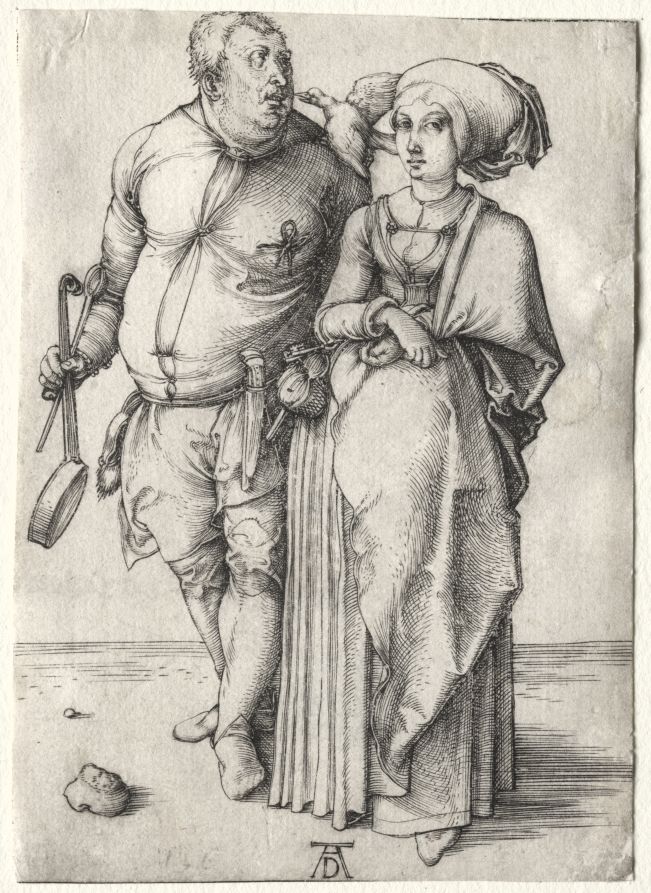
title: The Cook and His Wife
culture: Germany, late 15th-early 16th Century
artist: Albrecht Dürer (German, 1471–1528)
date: probably 1497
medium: engraving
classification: Print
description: Dürer’s curious engraving relates a comical story about the exposure of womanly deception. This housewife, identified by her clothing and the key and purse at her hip, had eaten an eel that her husband was saving. Although she denied it, her pet magpie, a bird associated with idle chatter, witnessed her deviousness and tattled. In revenge, she plucked the bird’s head bare and each time the magpie saw a bald man, the bird asked whether the man had also been telling the story of the eel. Even without knowing the narrative, the wife’s calculating glance toward the viewer and her husband’s dimwitted gluttonous appearance communicates the woman’s sense of superiority, but also her cunning.